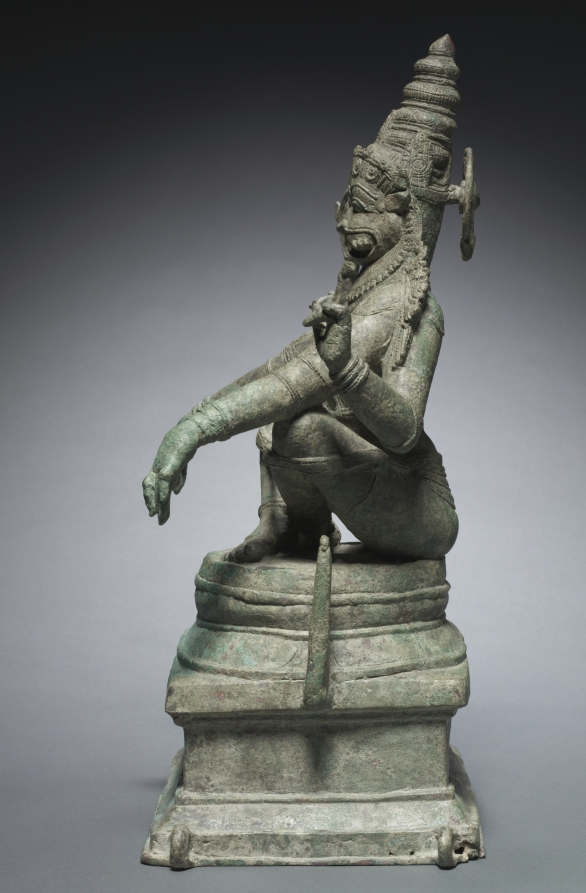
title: Yoga Narashimha, Vishnu in his Man-Lion Avatar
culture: South India, late Chola Period (900-13th Century)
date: c. 1250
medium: bronze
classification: Sculpture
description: The two posts on either side are for holding a halo that once encircled the figure.